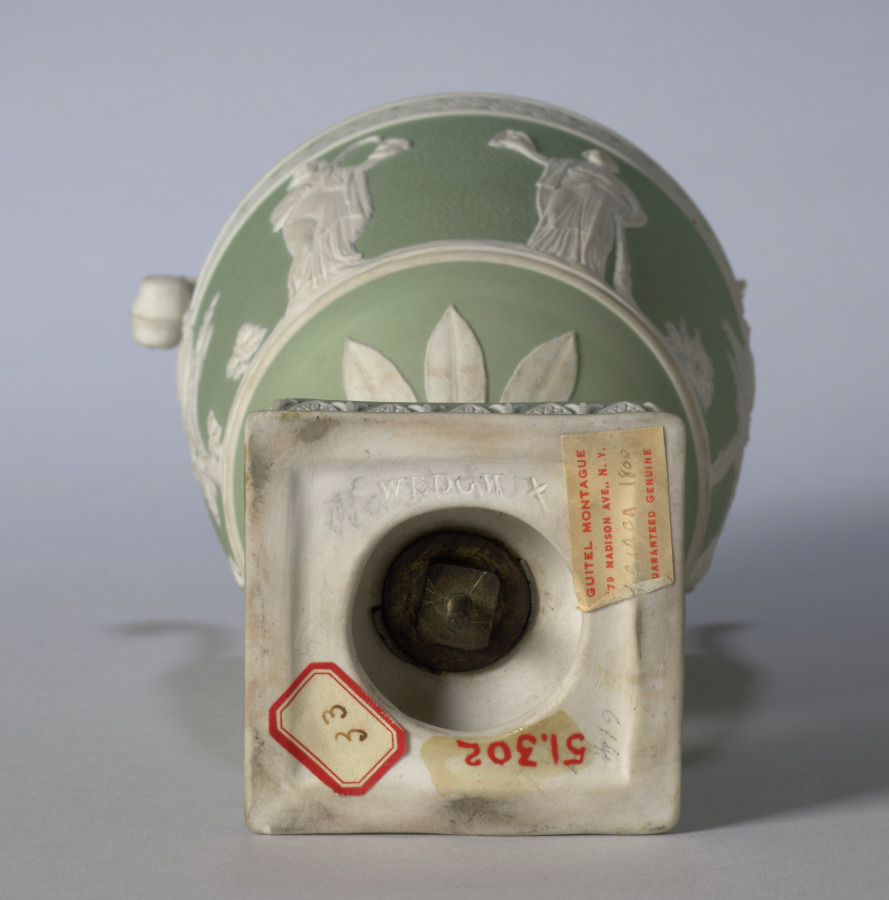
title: Urn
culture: England, Staffordshire, late 18th-early 19th Century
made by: Wedgwood Factory (British)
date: c. 1800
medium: jasper ware with relief decoration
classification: Ceramic